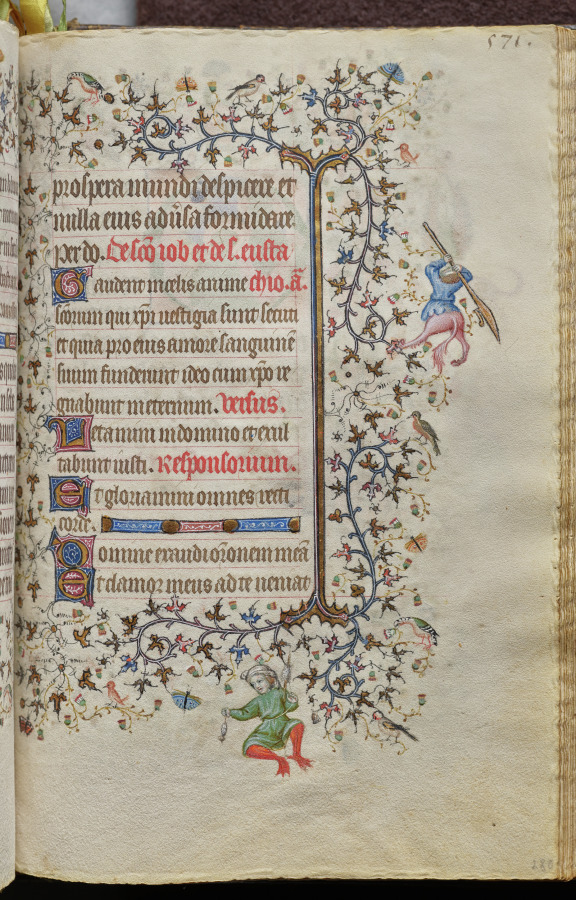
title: Hours of Charles the Noble, King of Navarre (1361-1425): fol. 280r, Text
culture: France, Paris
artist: Master of the Brussels Initials and Associates (French)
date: c. 1405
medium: ink, tempera, and gold on vellum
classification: Bound Volume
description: This precious volume was obviously highly prized by its owner, the French-born King of Navarre, who had his coat of arms painted on no less than twenty folios. Rather than directly commissioning this manuscript from a specific workshop, it seems that Charles the Noble acquired his book of hours -- perhaps ready-made for the luxury market -- while on a trip to Paris in 1404-05. A collaborative effort, six painting styles are evidenced within the pages of this codex, those of two Italians, two Frenchmen, and two Netherlanders. The painter who was responsible for the planning and decoration of the book, and who produced seventeen of the large miniatures, was a Bolognese artist known as the Master of the Brussels Initials. His principal assistant, responsible for most of the borders, was a Florentine who signed his name "Zecho" da Firenze on folio 208 verso.